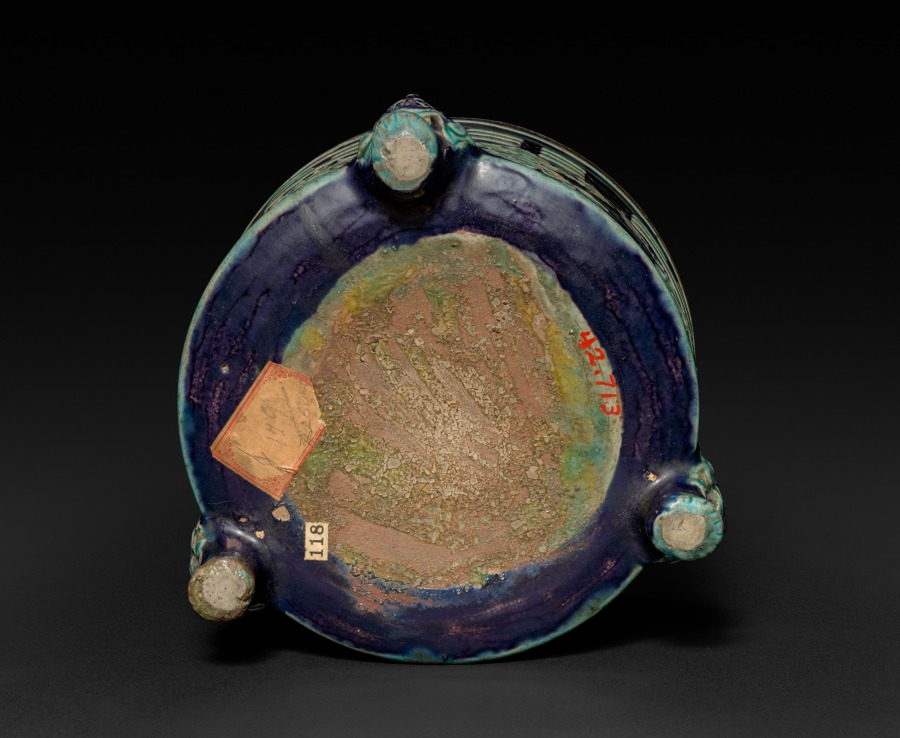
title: Small Jardiniere with Three Legs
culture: China, Jiangxi Province, Ming dynasty (1368–1644)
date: 1368–1644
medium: porcelain, Fahua ware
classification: Ceramic